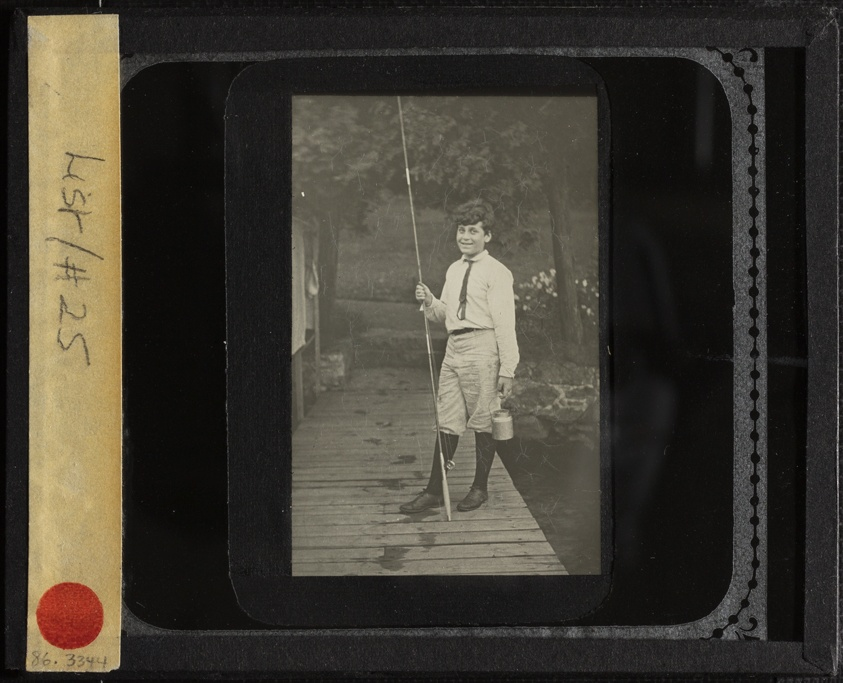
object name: Photograph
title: Untitled (Howard with fishing pole)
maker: Alfred Stieglitz (American, 1864–1946)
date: 1910 or 1912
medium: Lantern slide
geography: United States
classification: lantern slide (glass); negative/transparency; photography; photograph